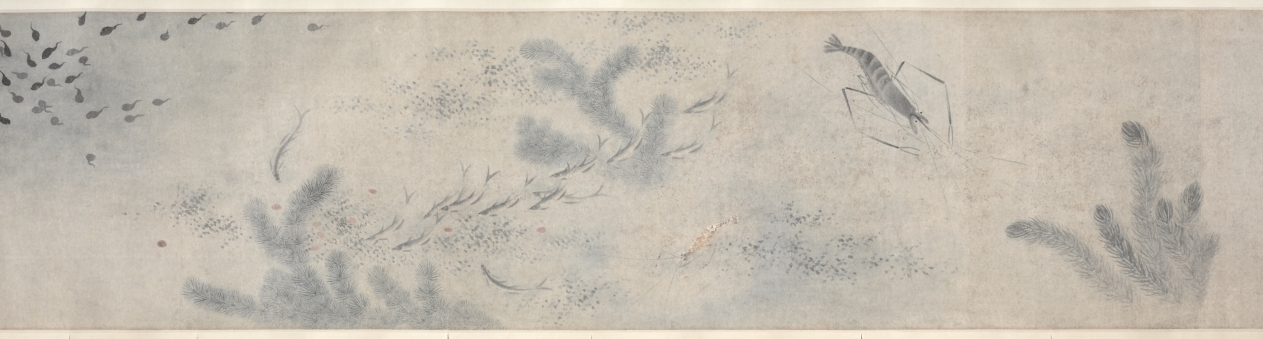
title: Insects and Flowers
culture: China, Qing dynasty (1644-1911) or Republican period (1912-49)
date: c. 1900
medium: Handscroll, ink and color on paper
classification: Painting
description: More than 26 feet long, this scroll presents insects, reptiles, and plants in delicate brushwork and pale colors, referring in style to earlier Southern Song dynasty (1127–1279) bird-and-flower paintings. Upon closer inspection, ants dismember a butterfly and reptiles wait to ambush their prey. An inscription at the end of the painting gives us an idea of its meaning: Attributed to the Qing dynasty scholar Zhang Xigeng (張錫庚, 1801–1861), the inscriber relates the work to an earlier painting by Qian Xuan (錢選, c. 1235–before 1307) and further suggests that the painting may allude to the relentlessness of natural selection. By drawing a parallel to tumultuous episodes in Chinese history, the writer might even hint at the domestic rebellions and the aggression of Western powers against China in his lifetime, particularly the Opium Wars (1839–60).